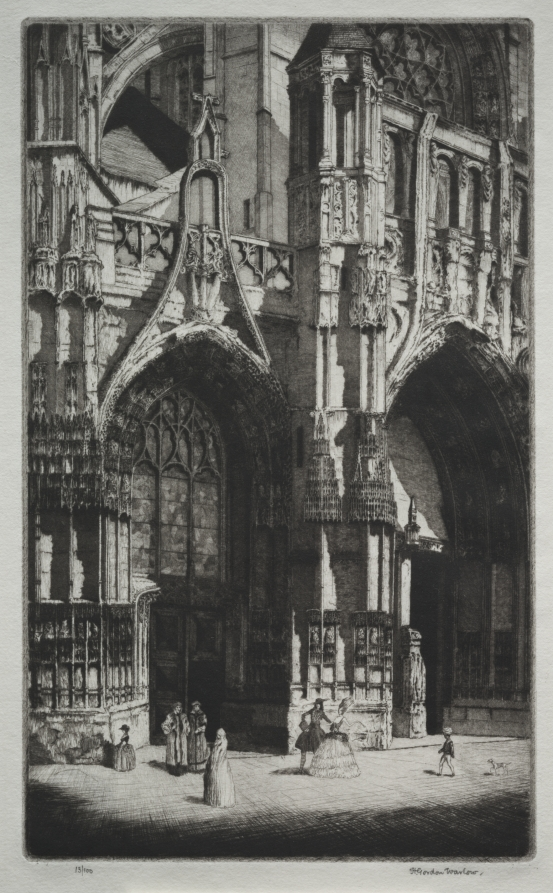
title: Nôtre Dame de Caudebec, France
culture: England, 20th century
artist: Herbert Gordon Warlow (British, 1885–1942)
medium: drypoint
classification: Print